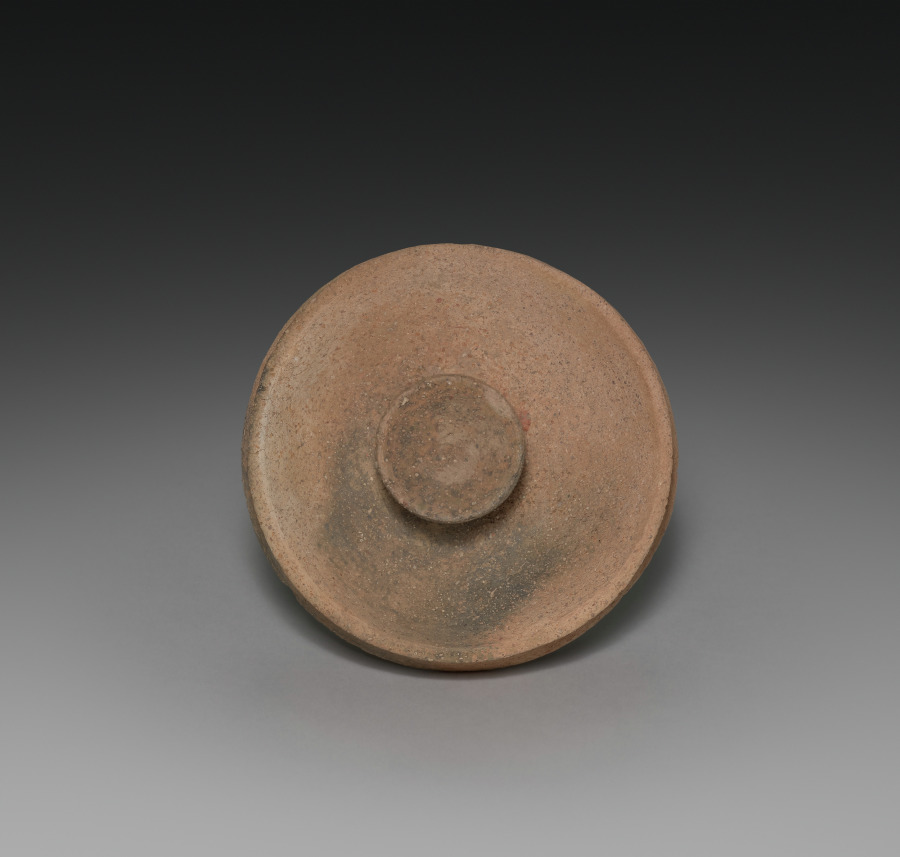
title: Lidded Jar (lid)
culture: Korea, Silla (57 BC-935) or Kaya (AD 42-562) period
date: 400s–500s CE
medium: red earthenware with incised band designs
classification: Ceramic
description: Early earthenware from the Three Kingdoms period (57 BCE–668 CE) became widely utilized as agriculture and religion grew to be essential elements in sustaining society and its systems. The clay jars of different sizes and shapes on display were made for the following purposes: to store harvested grains and seeds, or, especially lidded ones such as this, to preserve cremated remains, and to serve offerings in rituals.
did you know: Closed kilns built on hillsides became widely used for producing this type of pottery vessel in Korea during the Three Kingdoms period.